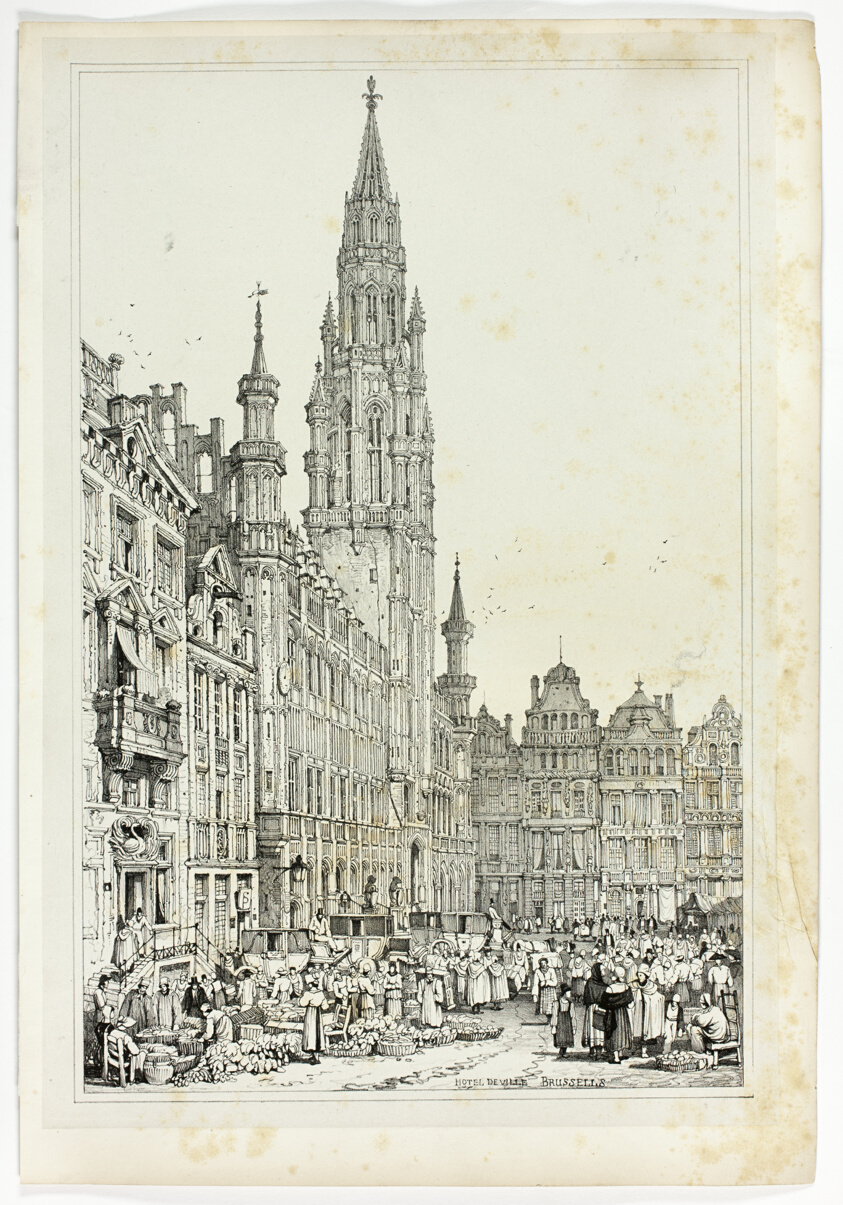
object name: Print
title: Hotel de Ville, Brussells, from Facsimiles of Sketches made in Flanders and Germany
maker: Samuel Prout (English, 1783-1852); printed by Charles Joseph Hullmandel (English, 1789-1850)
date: 1833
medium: Lithograph in black on grayish-ivory chine, laid down on ivory wove paper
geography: England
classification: lithograph; print; prints and drawing